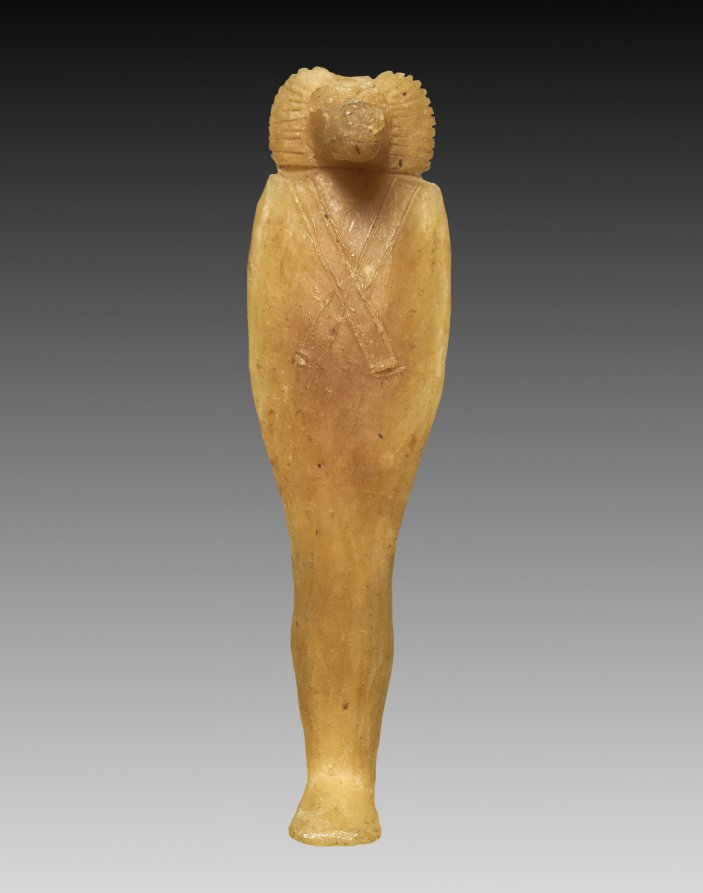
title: Son of Horus: Hapy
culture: Egypt, Third Intermediate (1069–715 BCE), Dynasties 21–22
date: 1000–900 BCE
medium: honey-colored wax with dark amber varnish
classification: Funerary Equipment